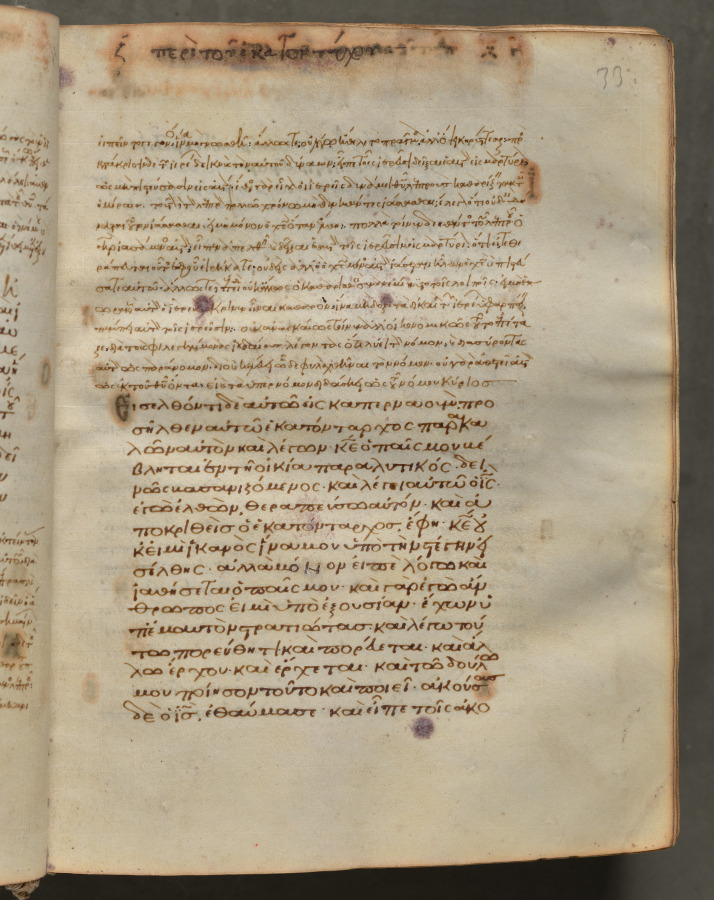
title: Text, folio 33 (recto), from a Gospel Book with Commentaries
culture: Byzantium, Constantinople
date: c. 1000–1100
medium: ink, tempera, and gold on vellum; leather binding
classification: Bound Volume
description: Each of the four gospels in this book opens on a page with brilliantly illuminated borders depicting the author of the text as well as birds—principally peacocks, symbols of the immortality of the soul—and fountains, representing the fountain of life and the salvation of the soul. This volume consists of 428 leaves with texts in Greek. Its level of sophistication suggests that it was probably written and decorated in a monastery in Constantinople.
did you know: Gospel Books were carried in procession through Byzantine churches.